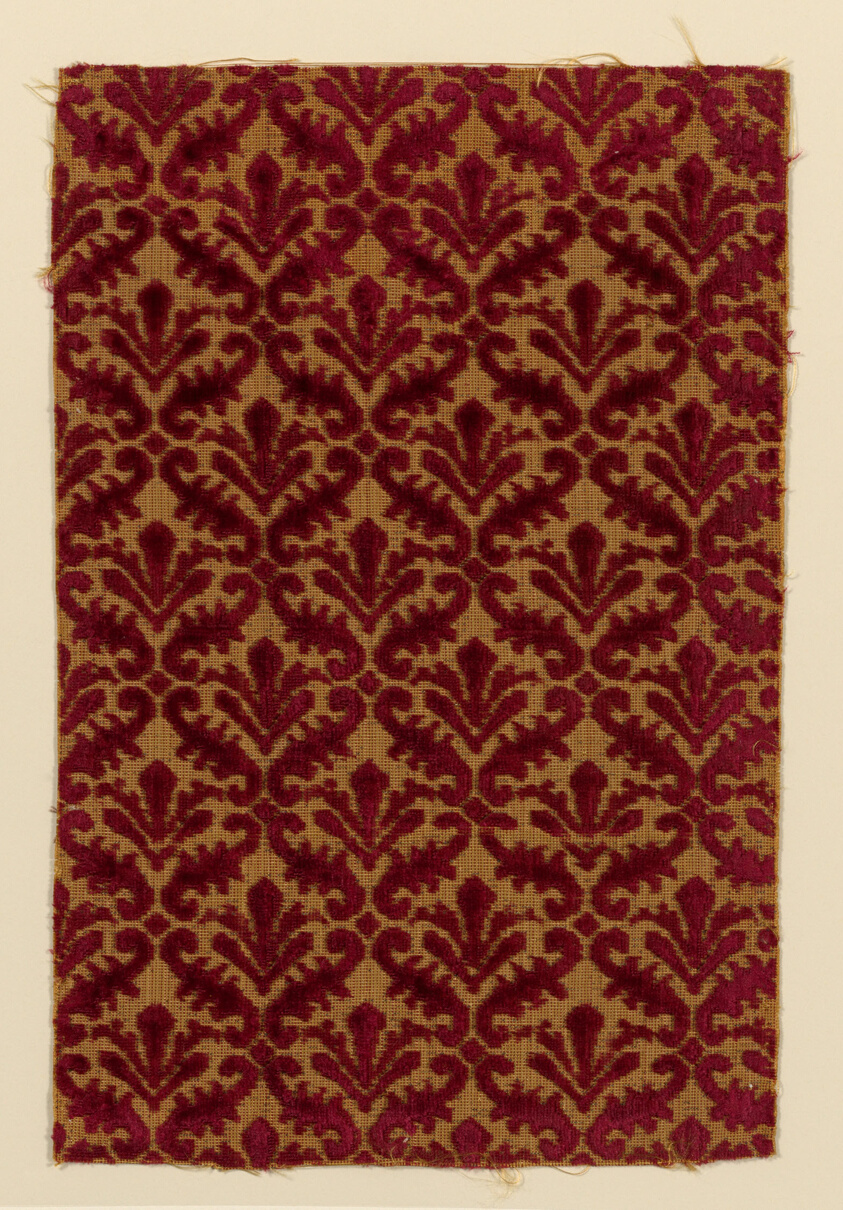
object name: Textile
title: Fragment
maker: Italy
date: c. 1600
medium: Silk and gold gilt strips, plain weave with supplementary patterning wefts and supplementary pile warps forming cut, uncut, and voided velvet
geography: Italy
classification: textile; weaving - velvet; weaving